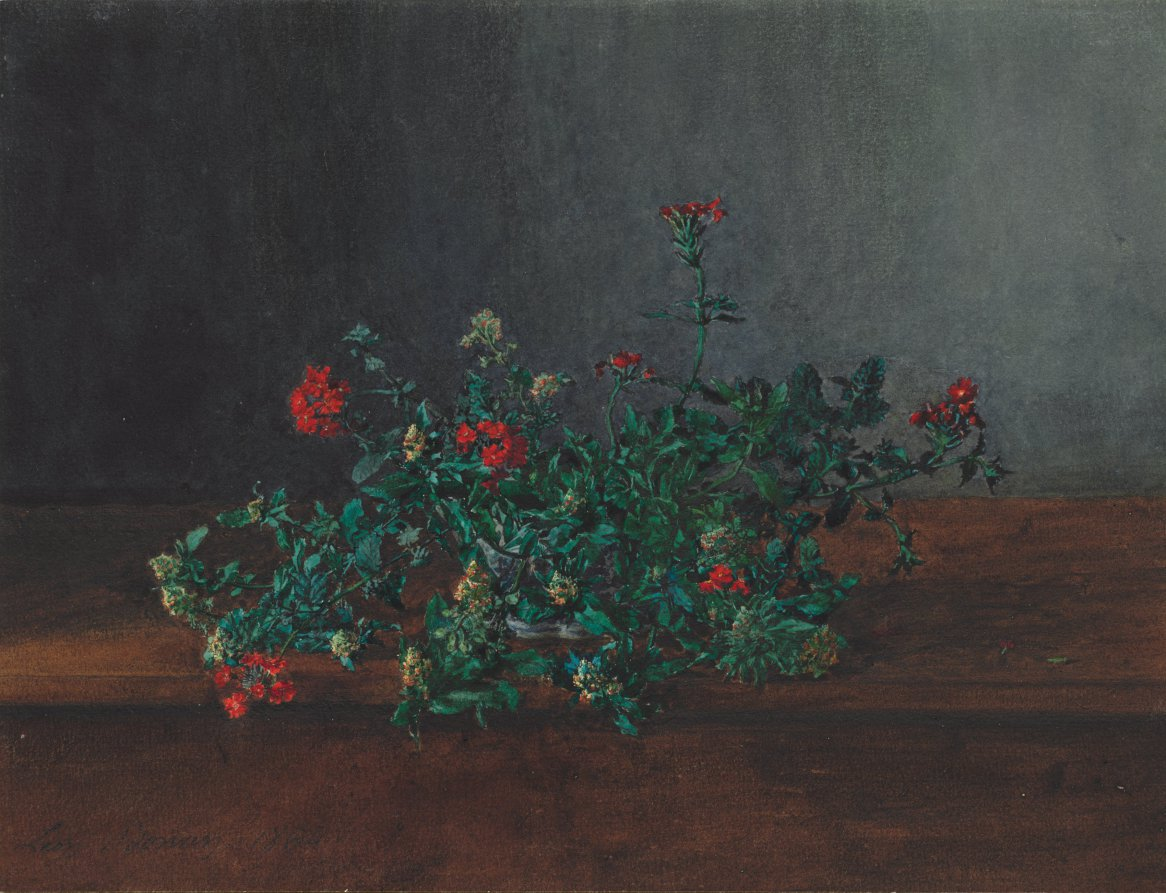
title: Still Life with Wild Flowers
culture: France, 19th century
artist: Léon Bonvin (French, 1834–1866)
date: 1864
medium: watercolor and gouache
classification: Drawing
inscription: signed, lower left, in black ink: Léon Bonvin. 1864.